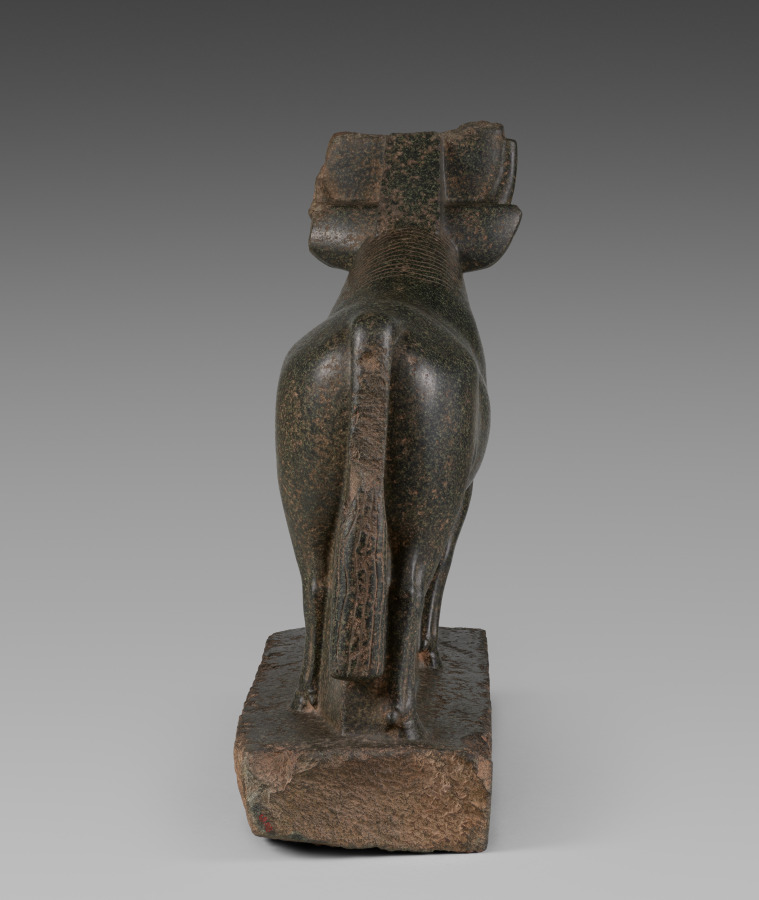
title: Apis Bull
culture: Egypt, Greco-Roman period (332 BCE–395 CE), Ptolemaic dynasty (305–30 BCE)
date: 400–100 BCE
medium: serpentinite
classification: Sculpture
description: Sacred animal cults have a long history in ancient Egypt, but they became even more important in the Ptolemaic and Roman periods. Because each god could incarnate himself into any animal species, beasts of all sorts--dogs, cats, ibises, crocodiles--were protected, venerated, mummified, and collected by the thousands in specialized animal cemeteries. The sacred bull cults were different. Apis, the bull of Memphis, was a god in his own right. But he was also associated with other deities, such as Ptah, the god of Memphis, and Osiris, in the form of Osiris-Apis (or Serapis). Statues and reliefs always show him crowned with a sun disk and cobra. When an Apis bull died, he was given a burial fit for a king in an area of the Memphite cemetery known as the Serapeum.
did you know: A larger base, likely inscribed, may have hidden the rough, unfinished lower edges of this statue.